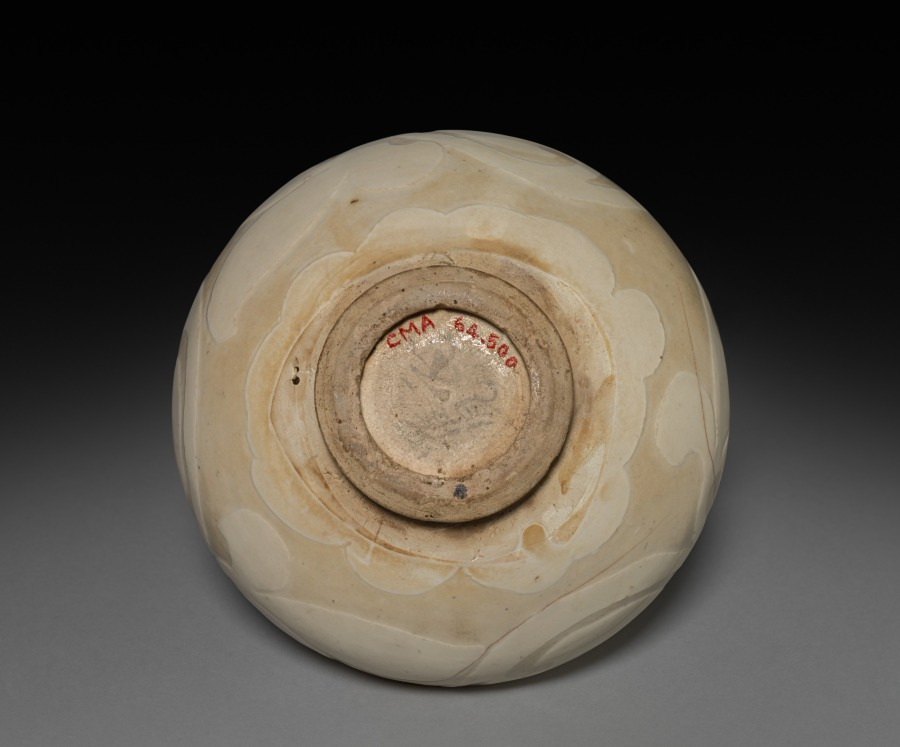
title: Jar: Cizhou ware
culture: China, Northern Song dynasty (960-1127) - Jin dynasty (1115-1234)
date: 12th-13th Century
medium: glazed light gray stoneware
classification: Ceramic